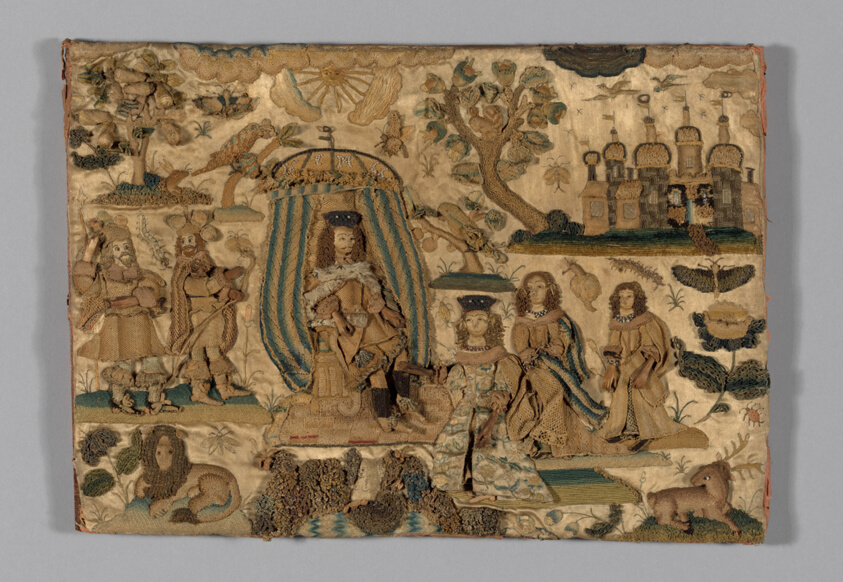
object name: Textile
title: Picture (Needlework)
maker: England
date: 1666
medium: Embroidered; raised work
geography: England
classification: textile; needlework (visual works)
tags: coat of arms, royalty